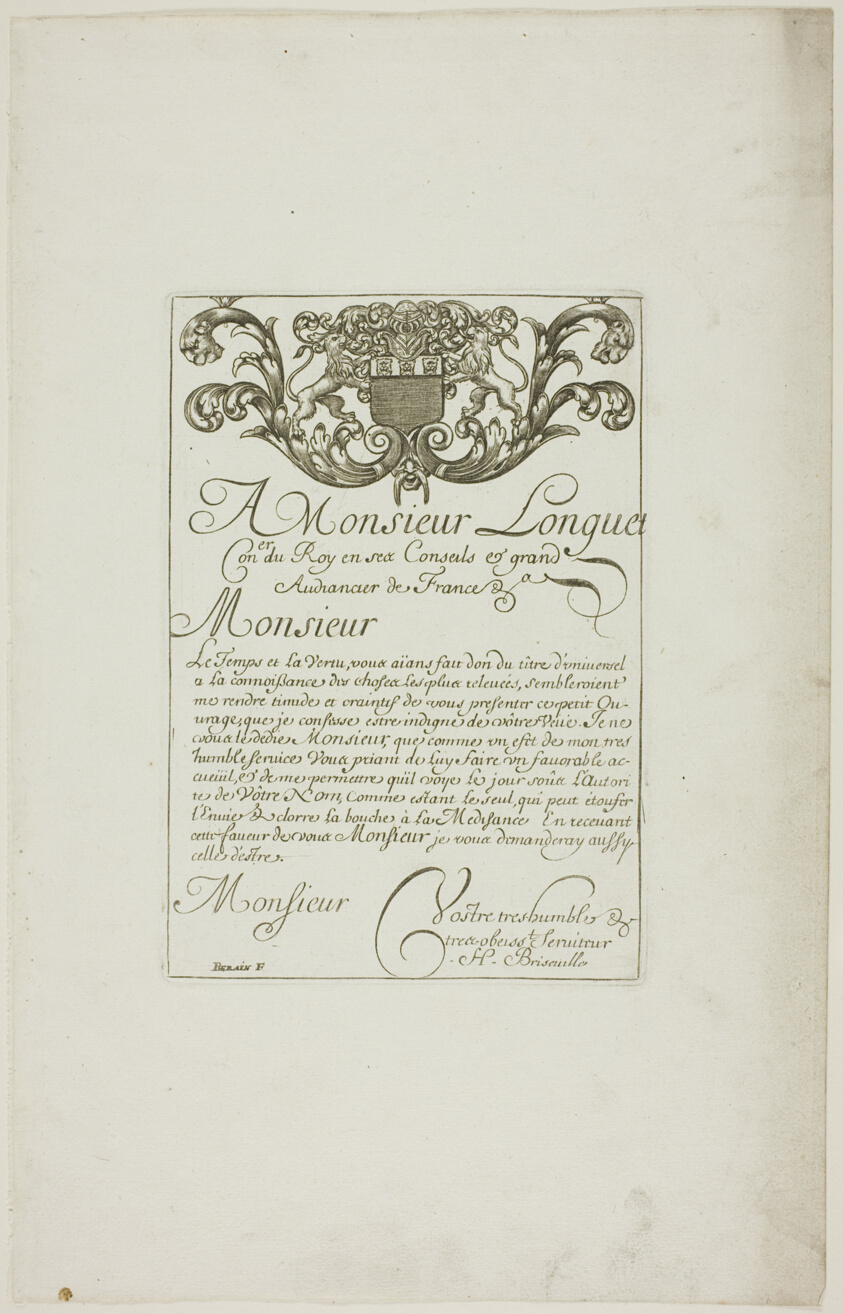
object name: Print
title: Designs for Locksmiths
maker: Jean Bérain I (French, 1640-1711); after Hugues Bris e Ville (French)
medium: Etching on paper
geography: France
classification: etching; print; prints and drawing